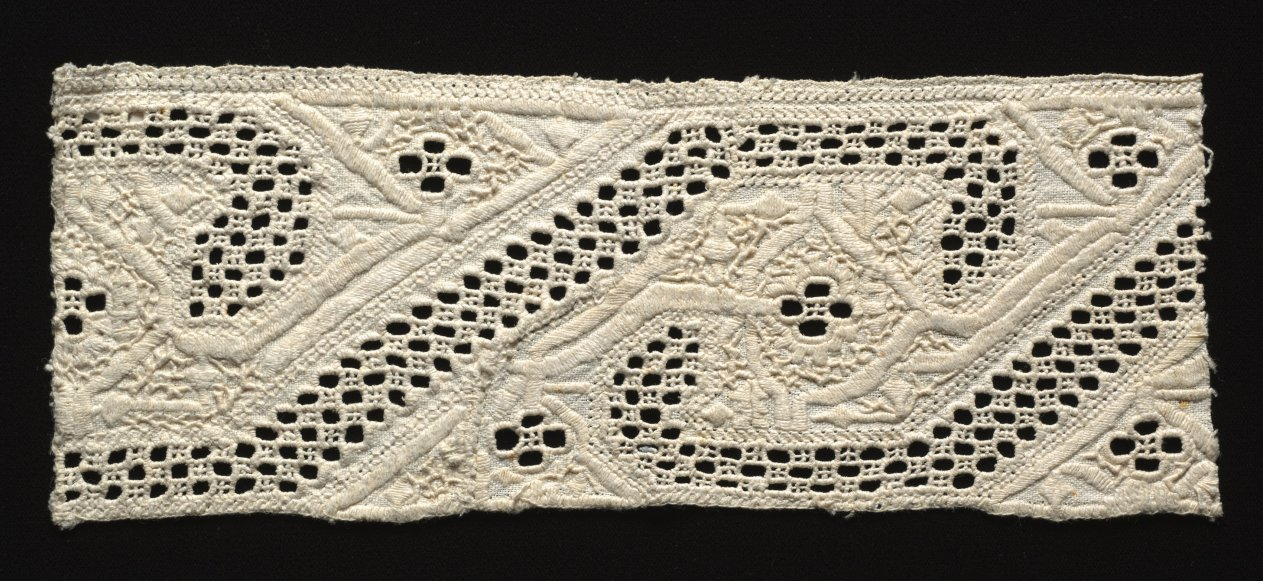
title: Lace fragment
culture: Italy, Venice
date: 1500s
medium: Linen: needle lace (cutwork and reticella) insertion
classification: Lace